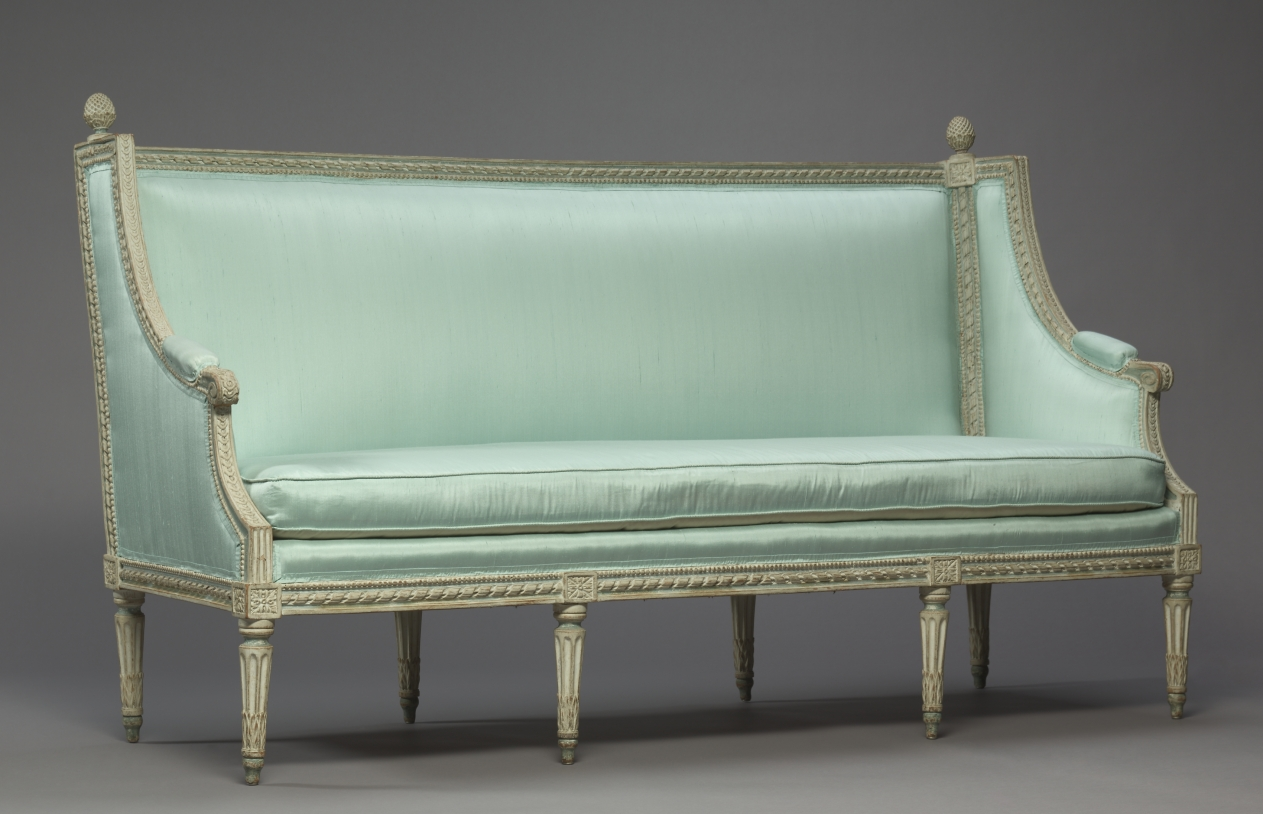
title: Settee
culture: France, 18th century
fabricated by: Philippe-Joseph Pluvinet (French, 1793)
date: c. 1780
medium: painted wood and upholstery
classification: Furniture and woodwork